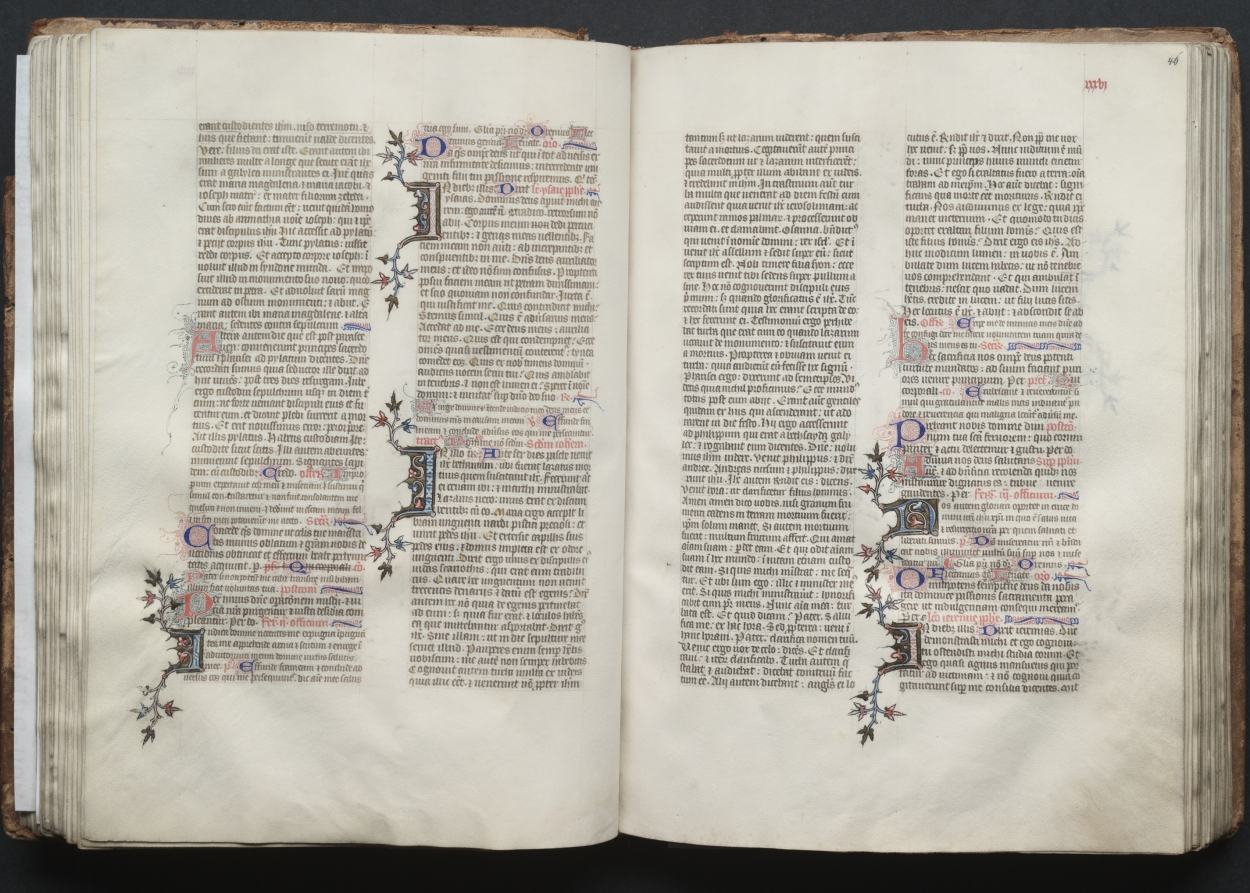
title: The Gotha Missal: Fol. 45v, Text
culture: France, Paris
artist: Master of the Boqueteaux (French)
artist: and Workshop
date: c. 1375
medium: ink, tempera, and gold on vellum; blind-tooled leather binding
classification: Bound Volume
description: The style and quality of this manuscript's decoration is typical of deluxe Parisian books made for aristocratic or royal patrons. Most of the book's decoration appears to be the work of the Master of the Boqueteaux, an artist active at the court of King Charles V (died 1380). His style was apparently shared by a number of book illuminators working in and around Paris. It is very possible that the Gotha Missal belonged to Charles V, but is not provable because the manuscript has no royal portraits and lacks a colophon. Given the book's magnificent decoration, however, it would seem that it was produced for a Valois prince, if not for the king himself. The manuscript receives its name from the German dukes of Gotha, its later owners.